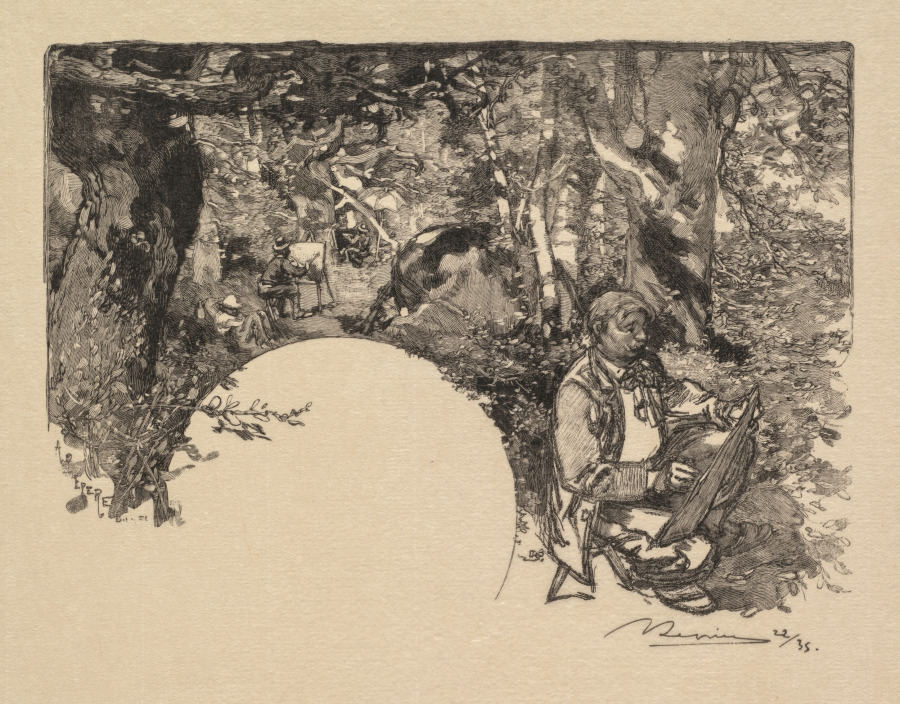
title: Fontainebleau Forest: The Painters (La Forêt de Fontainebleau: Les Peintres)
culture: France, 19th century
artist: Auguste Louis Lepère (French, 1849–1918)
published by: A. Desmoulins, Published in Revue Illustrée, 1887–90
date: 1890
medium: wood engraving from bound volume of 34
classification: Bound Volume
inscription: In block, lower left: A. LEPERE del. sc.; below image, lower right, in black ink: ALepère 22/35; on window mat, lower right, in graphite: Les Peintres